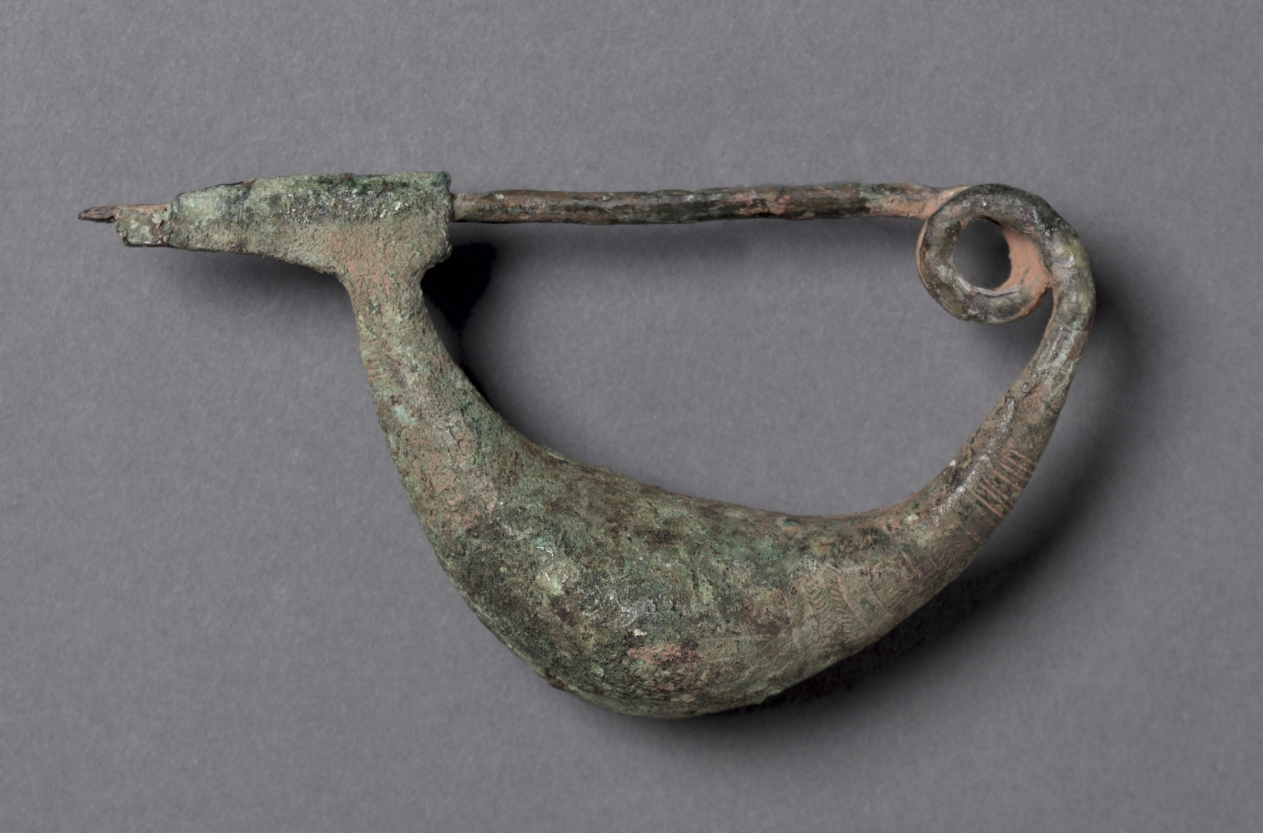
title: Boat-Shaped Fibula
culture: Etruscan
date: 900–700 BCE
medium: bronze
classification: Jewelry